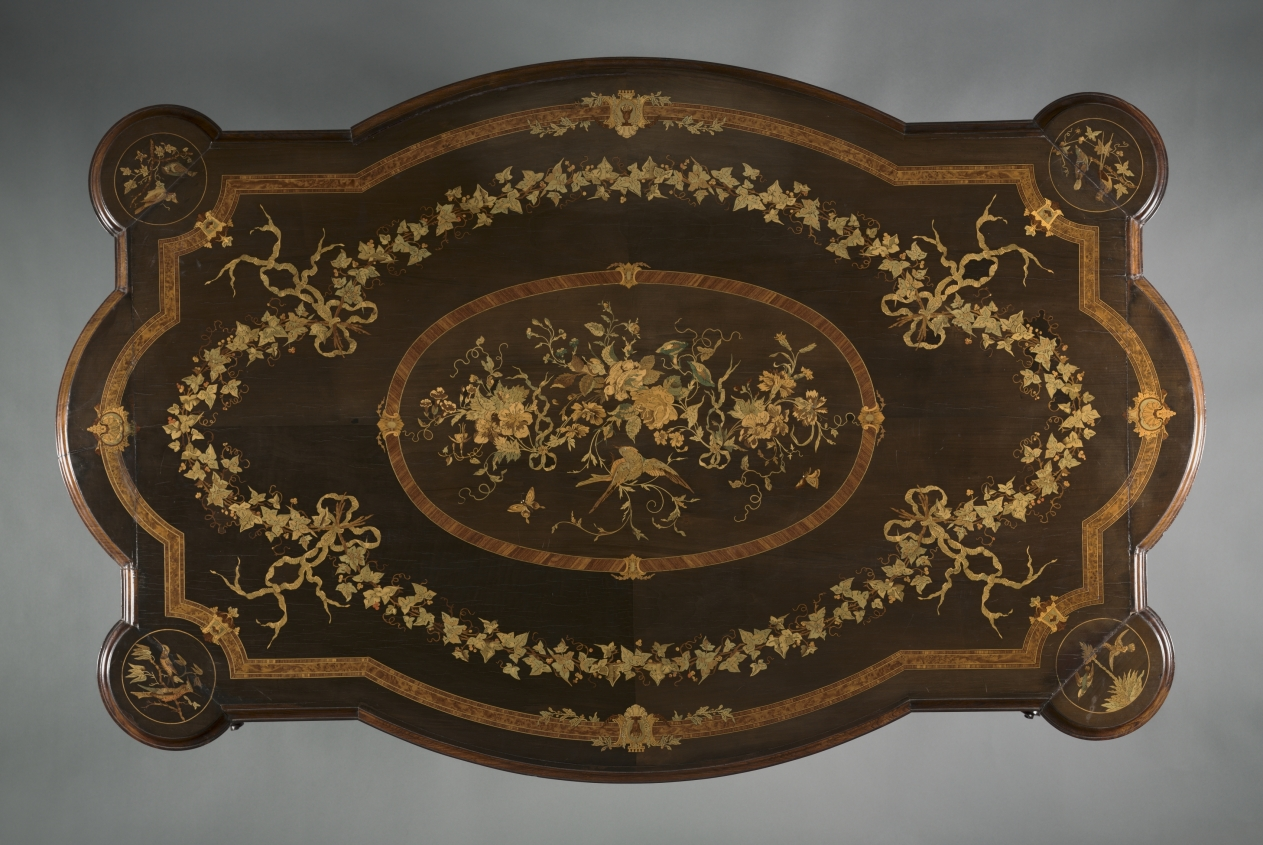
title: Center Table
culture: America, New York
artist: Gustave Herter Firm (American)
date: c.1860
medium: rosewood with marquetry of various woods, brass inlay, and gilding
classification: Furniture and woodwork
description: Gustave Herter was born in Germany and came to America about 1848. This table can be identified as his work because of its close resemblance to a table supplied by Herter about 1860 to the Victoria Mansion in Portland, Maine. The pictorial marquetry of the top may have been imported from France and incorporated into this table, probably made in New York.